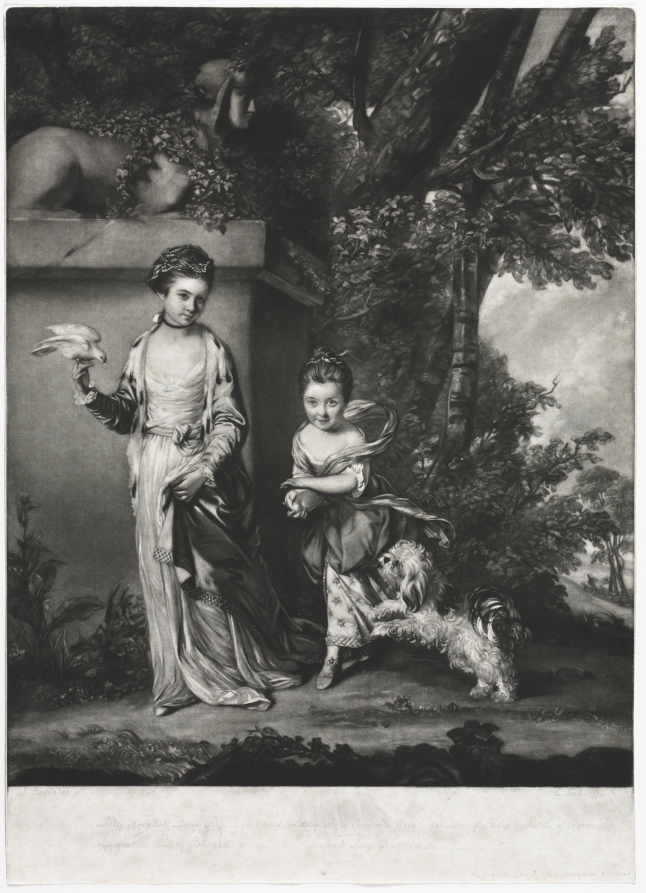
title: The Ladies Amabel and Mary Jemima Yorke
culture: England, 18th century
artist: Edward Fisher (British, 1722–1785)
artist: after Joshua Reynolds (British, 1723–1792)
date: c. 1761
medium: mezzotint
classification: Print